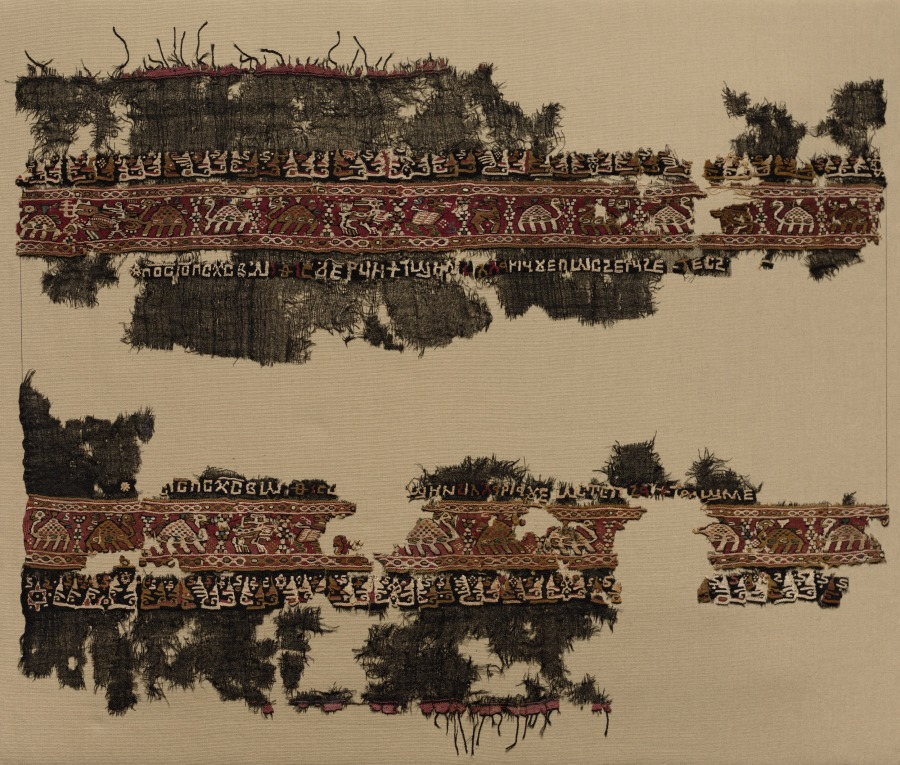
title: Decorated ends of a shawl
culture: Egypt, Fayyum, Tulunid or Ikshīdid period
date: 770–887 (radiocarbon date, 95.4% probability)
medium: Wool, linen, and silk: plain weave with inwoven tapestry weave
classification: Textile